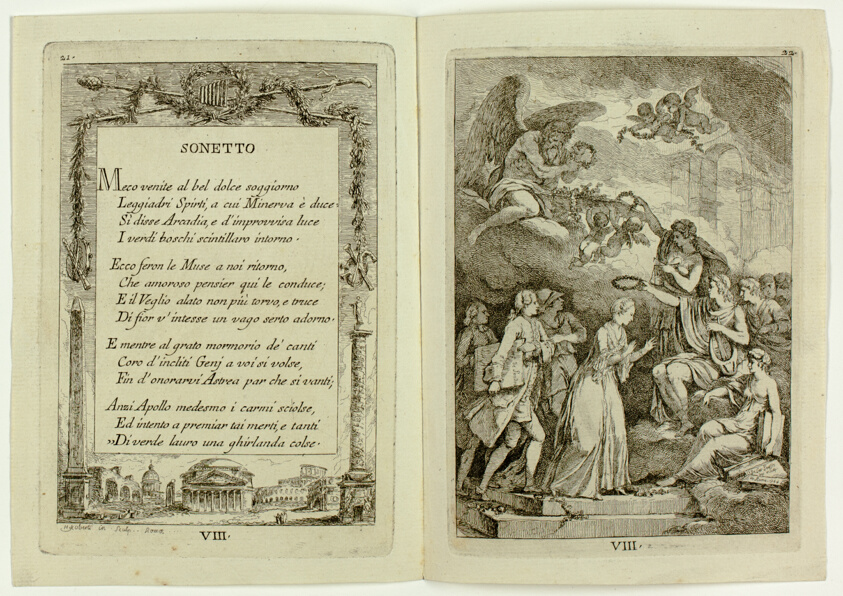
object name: Print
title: Plate 8, from Nella Venuta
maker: Franz Edmund Weirotter (Austrian, 1730–1771); after Etienne de Lavallée-Poussin (French, 1735–1802)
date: 1764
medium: Two etchings in black on ivory laid paper, folded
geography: France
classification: print; prints and drawing